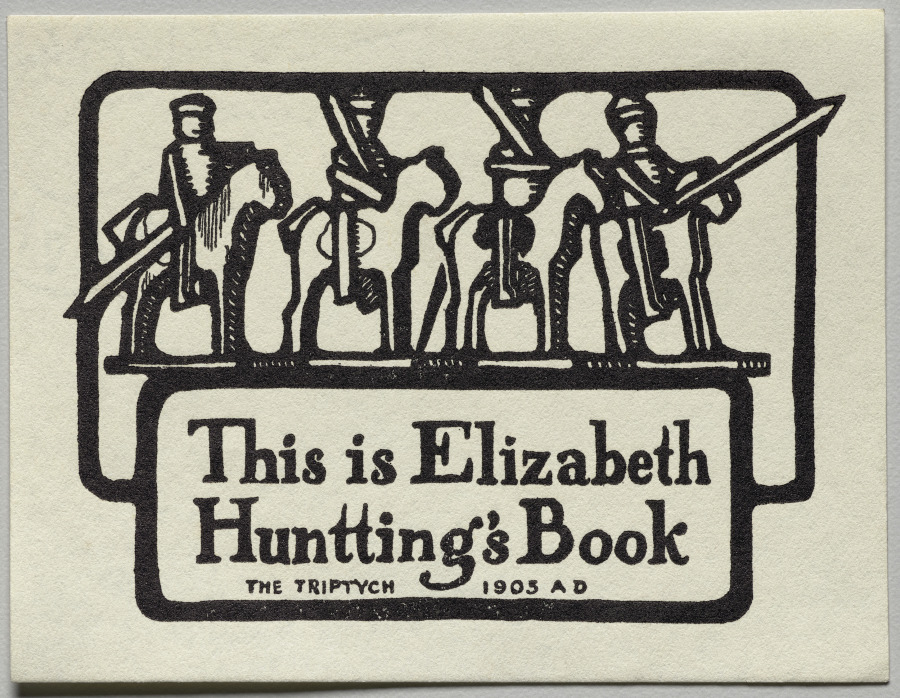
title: Bookplate: Elizabeth Huntting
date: 1903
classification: Print